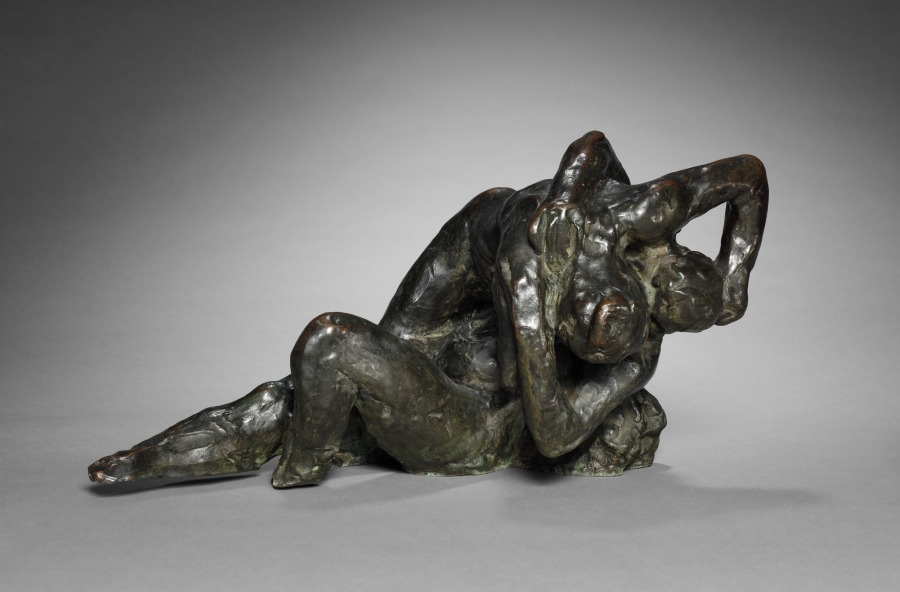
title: Les Damnées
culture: France, 19th century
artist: Auguste Rodin (French, 1840–1917)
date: 1885–1895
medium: bronze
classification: Sculpture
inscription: Signed front bottom right: "A. Rodin"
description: Rodin derived this couple, whose twisted bodies are locked painfully together, from the naked figures writhing in agony in his monumental sculpture The Gates of Hell.